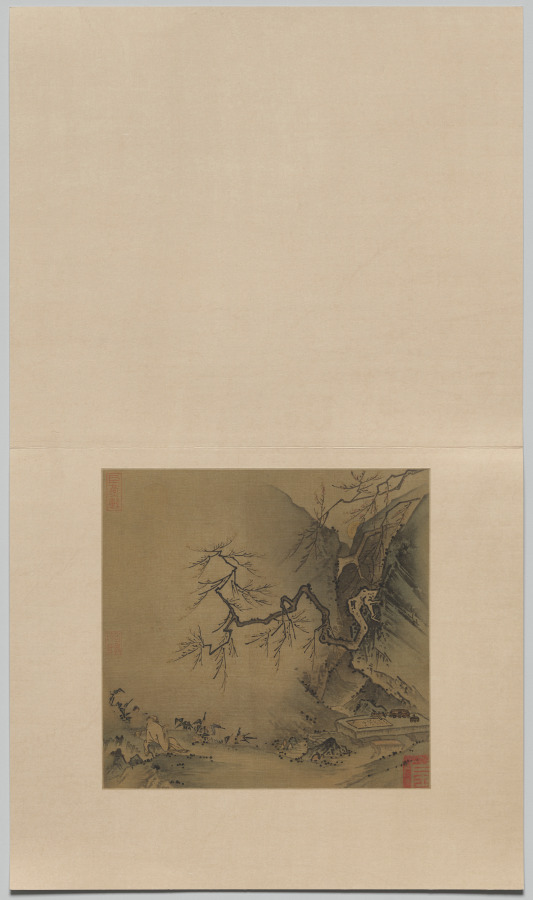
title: Drinking in the Moonlight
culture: China, Southern Song dynasty (1127-1279)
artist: Ma Yuan (Chinese, c. 1150–after 1255)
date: late 1100s–early 1200s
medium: Album leaf; ink on silk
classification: Painting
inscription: 1-1/2 seals: half-seal of Ming imperial collection (used 1372–84); 1 unidentified.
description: Once the moon rises and the wine is finished, perhaps the reclined tipsy gentleman will return to the stone table, where ink, paper, and brush can be seen. For moon enthusiasts in Hangzhou, there was a site named Yue Yan, or Moon Cliff, behind the imperial precincts on Mount Fenghuang. With its geographical features of receding craggy rocks leading to the framed full moon, there is good reason to believe that the scene depicts this specific site. The association of this painting with Ma Yuan is stylistically based. However, the brushwork accords more with the aesthetic approach of his son, Ma Lin.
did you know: The gentleman depicted is relaxing with a cup of wine in his hand.